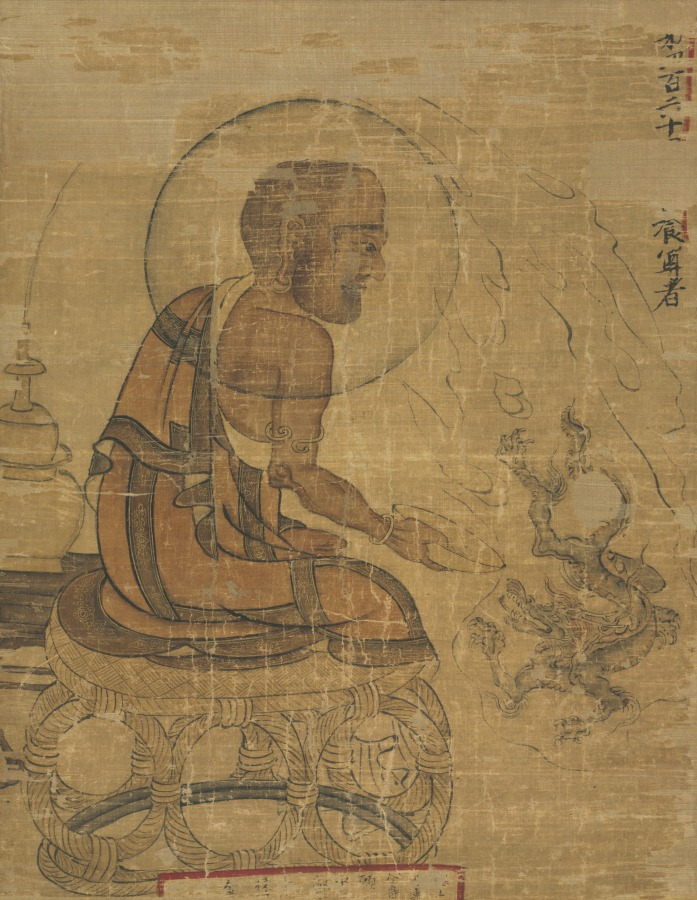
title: Arhat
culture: Korea, Goryeo dynasty (918–1392)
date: 1235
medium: Hanging scroll; ink and slight color on silk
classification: Painting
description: An arhat (Nahan in Korean), an advanced disciple of the Buddha, is represented here in profile with a halo encircling his head. This particular arhat is Segongyang jonja, numbered as the 464th of 500 arhats. He sits on a woven bamboo stool, is luring a dragon into an alms bowl. This hanging scroll is one of only about ten known works that survive today, all of which (except for Cleveland’s piece) are currently preserved in Korea or Japan.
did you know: This painting that depicts an arhat, a human being who has achieved enlightenment, used to be part of a set of 500 hanging scrolls.